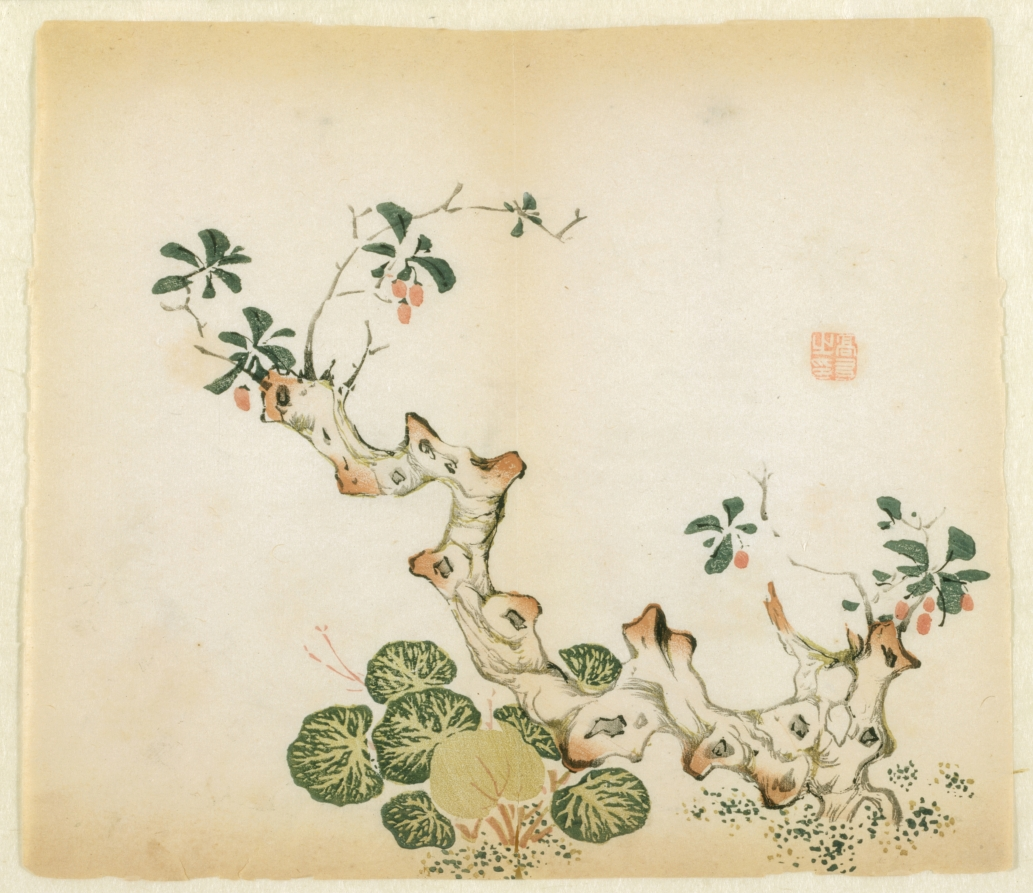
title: Branching Stump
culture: China, Ming dynasty (1368-1644) or later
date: 1368–1644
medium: color woodblock print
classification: Print